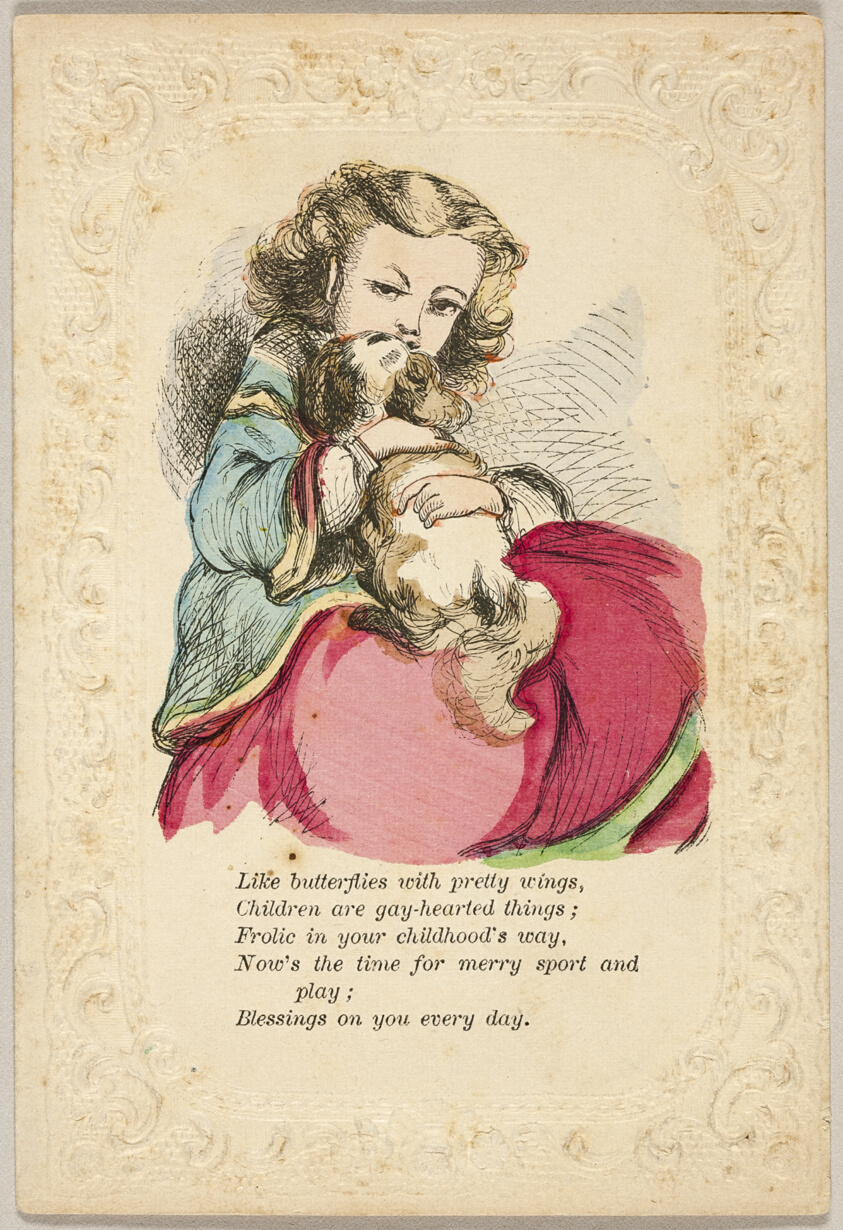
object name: Print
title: Like Butterflies with Pretty Wings (valentine)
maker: Unknown Artist; American, 19th century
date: 1860/69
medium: Lithograph with hand-coloring on embossed ivory wove paper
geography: United States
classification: valentine; prints and drawing; print